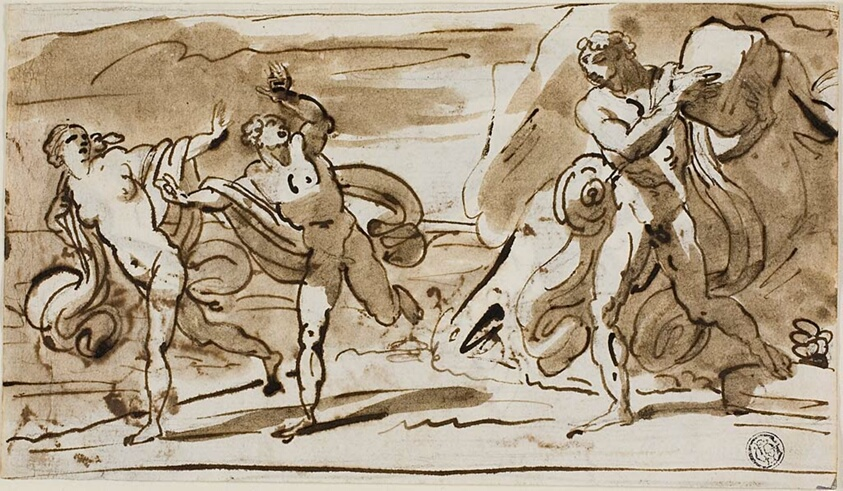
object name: Drawing and Watercolor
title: Polyphemus Throwing Boulders at the Fleeing Aeis and Galatea (recto); Polyphemus Playing His Reed Pipes for Galatea (verso)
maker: Pobably Felice Giani (Italian, 1758-1823); or possibly Fortunato Durati (Italian, 1787-1863); or possibly Juan Bautista Martinez del Mazo (Spanish, 1612-1667)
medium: Pen and brown ink and brush and brown wash, over touches of black chalk (recto and verso), on ivory laid paper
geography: Italy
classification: pen and ink drawings; drawings (visual works); prints and drawing